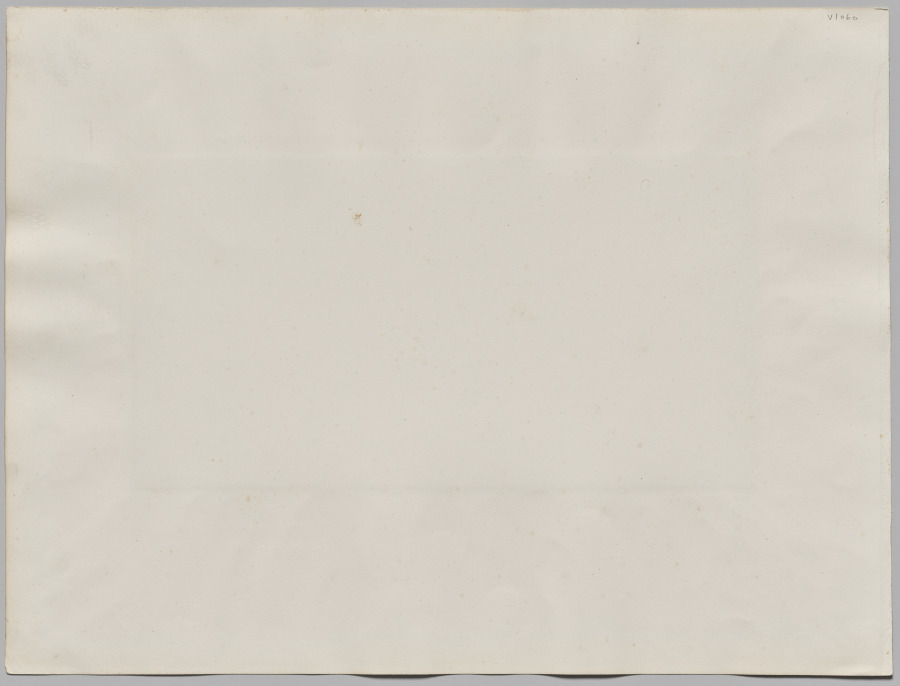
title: Lyon. Viaduc du Rhône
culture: France, 19th century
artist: Édouard Baldus (French, 1813–1889)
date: c. 1860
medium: albumen print from collodion negative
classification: Photograph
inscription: Imprinted in black ink on recto of mount: “LYON. VIADUC DU RHÔNE”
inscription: Written in black ink on recto of mount: “E. Baldus”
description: Edouard Baldus, one of the greatest French architectural photographers, documented many of the engineering projects and economic growth that accompanied the construction of the railroads in France. Bridges and viaducts were examples of advancing engineering technology and critical structures for commerce. In this view by Baldus, the viaduct’s repeating arches form a soothing rhythm suggestive of classical balance and symmetry at odds with its modern role.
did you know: This cast-iron railway bridge, completed in 1857, still carries trains today.